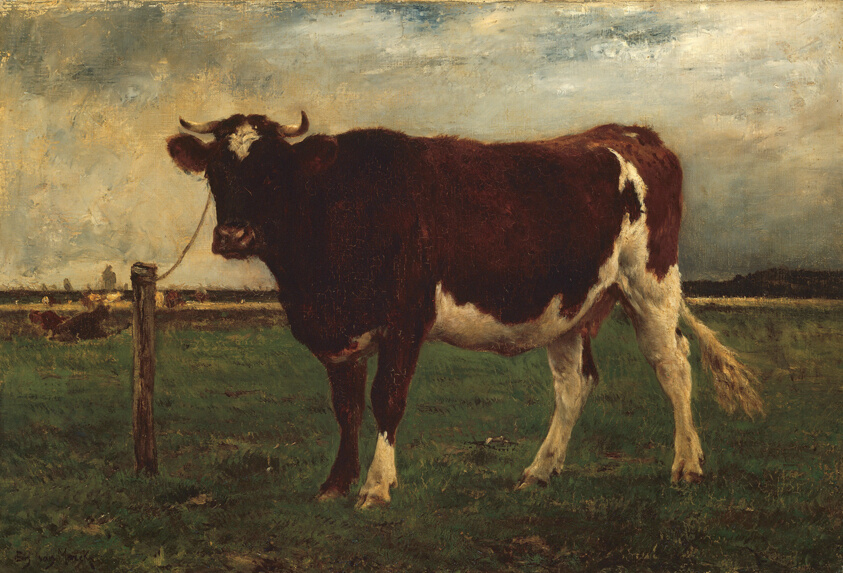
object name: Painting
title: Study of a Cow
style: nineteenth century, 19th century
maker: Emile van Marcke de Lummen (French, 1827–1890)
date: c. 1875–90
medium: Oil on canvas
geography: France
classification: painting; french; paint; oil paintings (visual works); oil on canvas; european painting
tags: cows, sky, pastures, landscape, farm, clouds, animals